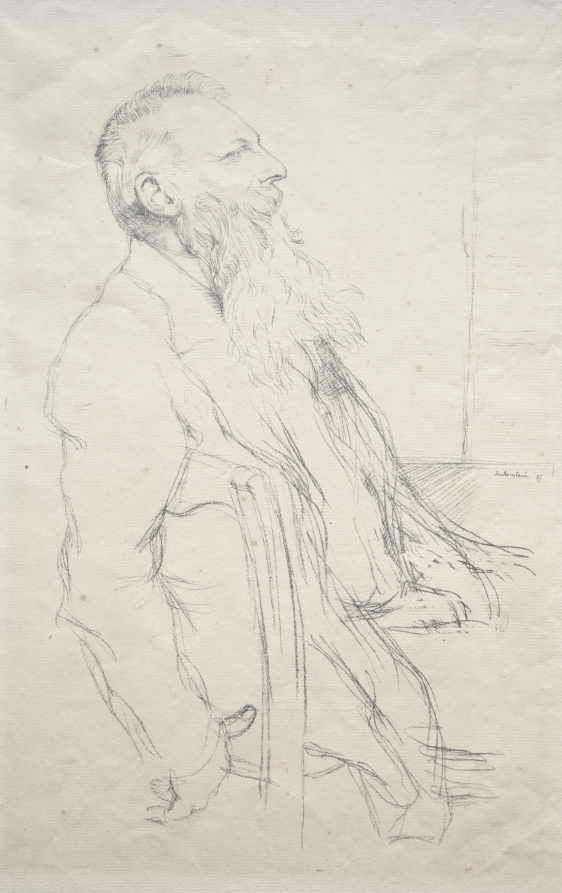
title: Auguste Rodin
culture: England, 20th century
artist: William Rothenstein (British, 1872–1945)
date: 1897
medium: lithograph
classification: Print